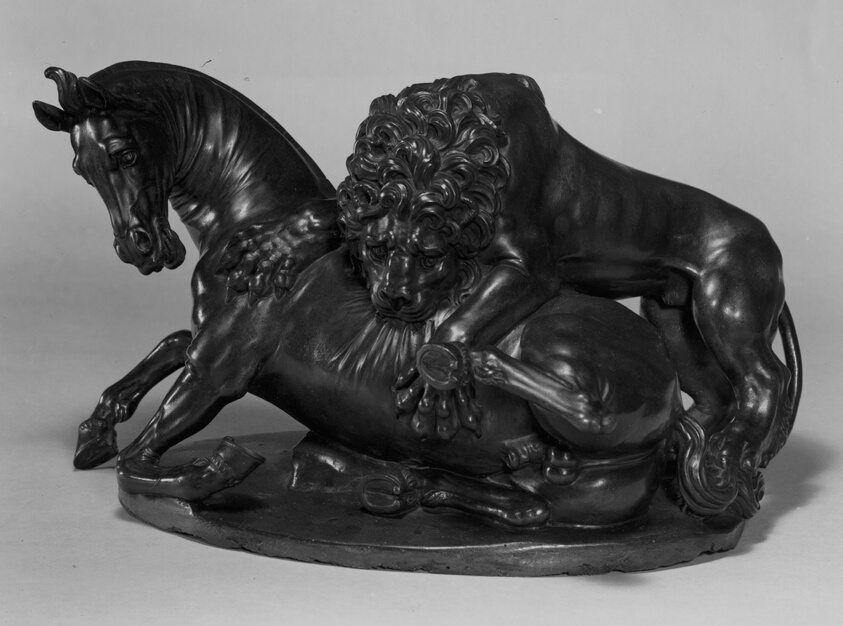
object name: Sculpture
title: Lion Attacking a Stallion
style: 17th Century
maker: Antonio Susini (Italian, active 1574–1624); After Giovanni da Bologna (Italian, 1524–1608)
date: 1600/20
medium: Bronze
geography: Italy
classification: statuette; sculpture; bronze; Italian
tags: animals, violence, horse, lions